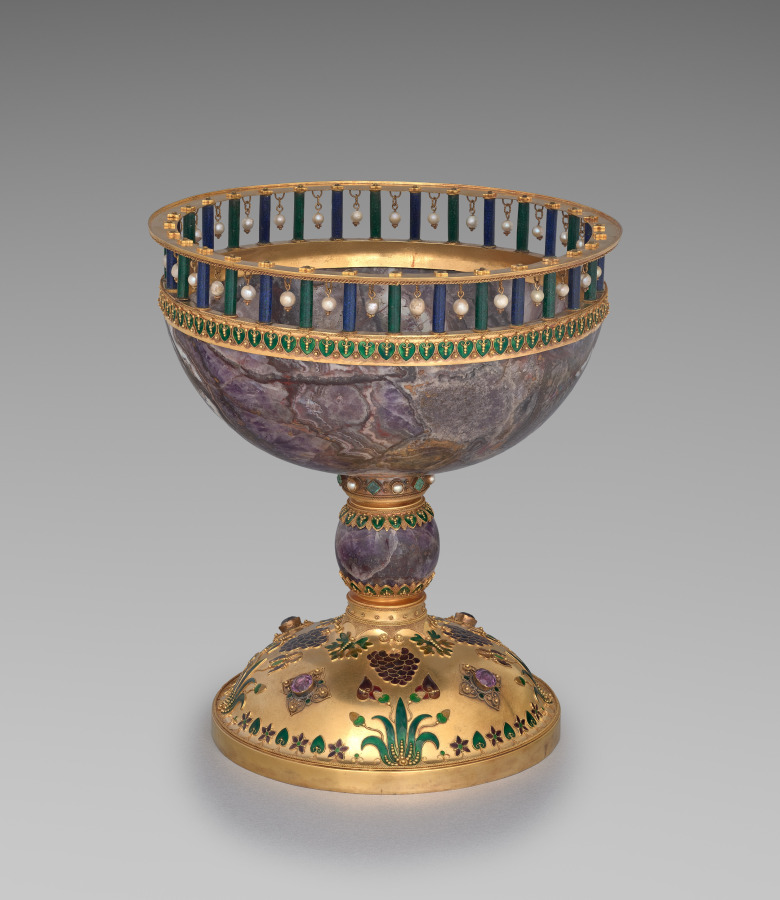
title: Cup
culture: France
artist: Armand Point (French, 1861–1932)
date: c. 1897–99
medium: Gilt copper alloy, cloisonné enamel, amethyst, emerald, ruby, pearls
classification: Metalwork